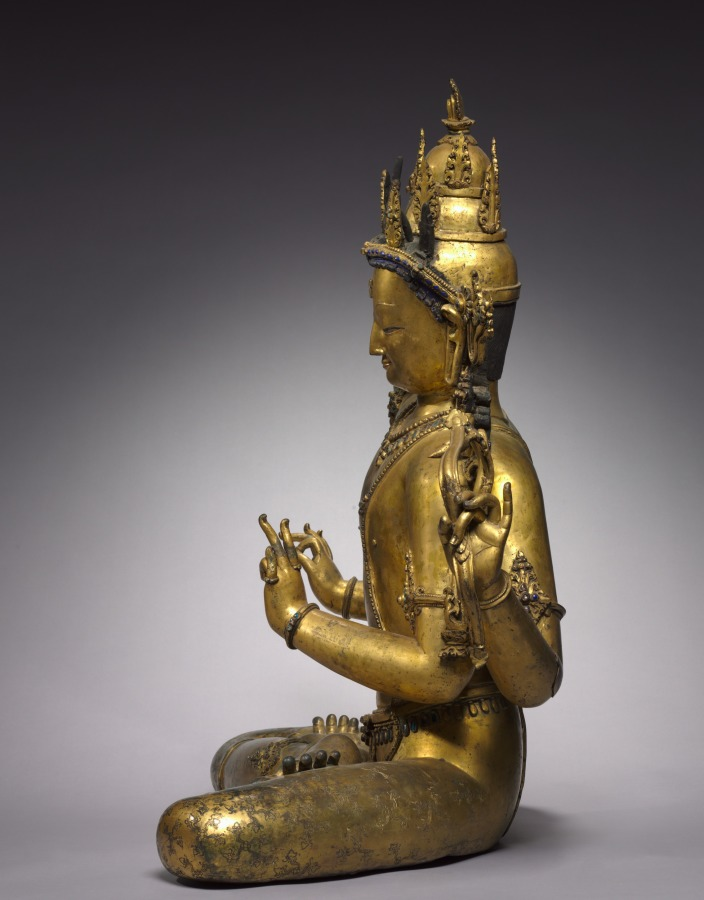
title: Bodhisattva of Wisdom (Manjushri)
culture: Nepal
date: 1400s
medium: Gilt bronze with precious and semiprecious stones, gum tempera, and cold gold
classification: Sculpture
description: This image depicts one of the main bodhisattvas, beings only one stage away from full enlightenment. Because the historical Buddha was a prince prior to his renunciation and life as a wandering ascetic, bodhisattvas are depicted as royal princes. This example has the sharp features, sweet expression, and crisp details characteristic of images made in Nepal during the 1400s. In his upraised right hand Manjushri holds the hilt of a sword that, like wisdom itself, metaphorically cuts through and defeats ignorance. His lower, rear left hand grasps a bow, once probably strung with a wire. Also missing is the arrow that he likely held in his lowered right hand. Arrows were often symbols for mantras, or strings of syllables thought to have the power to focus the mind and work like missiles to destroy negativity and affliction. The gesture of his lowered left hand indicates the transmission of Buddhist teachings. The lotus stem that rises at the left elbows originally held a book of sutras. This figure is in the yogic posture of meditation with the big toe flexed in concentration. Yoga is of central importance in tantric Buddhism, because high-level practitioners are able to discipline the body to such an extent that the mind can also be controlled.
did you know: The bodhisattva's short breeches are patterned in spiraling floral forms incised into the metal.